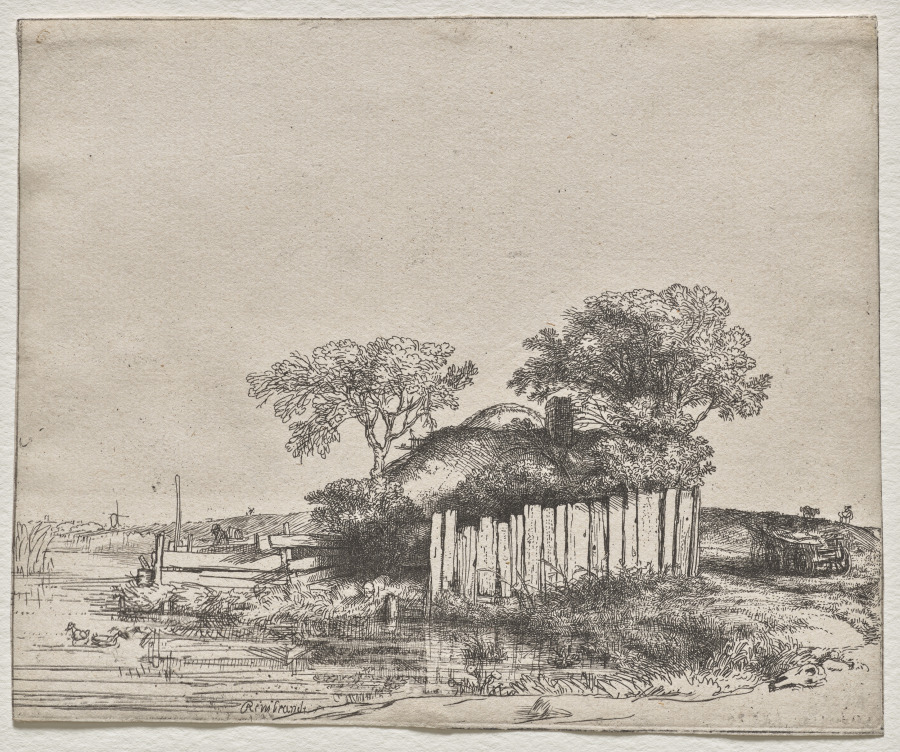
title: Cottage with a White Paling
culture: Netherlands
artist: Rembrandt van Rijn (Dutch, 1606–1669)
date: 1648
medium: etching and drypoint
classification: Print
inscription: lower left, in plate: Rembrandt f / 1648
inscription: upper left, in pen and brown ink: 6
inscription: lower right, in graphite (erased): 274 / [illegible]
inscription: verso, upper center, in graphite: 224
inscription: verso, lower right, in graphite: 9690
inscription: verso, lower right, in graphite: WCX